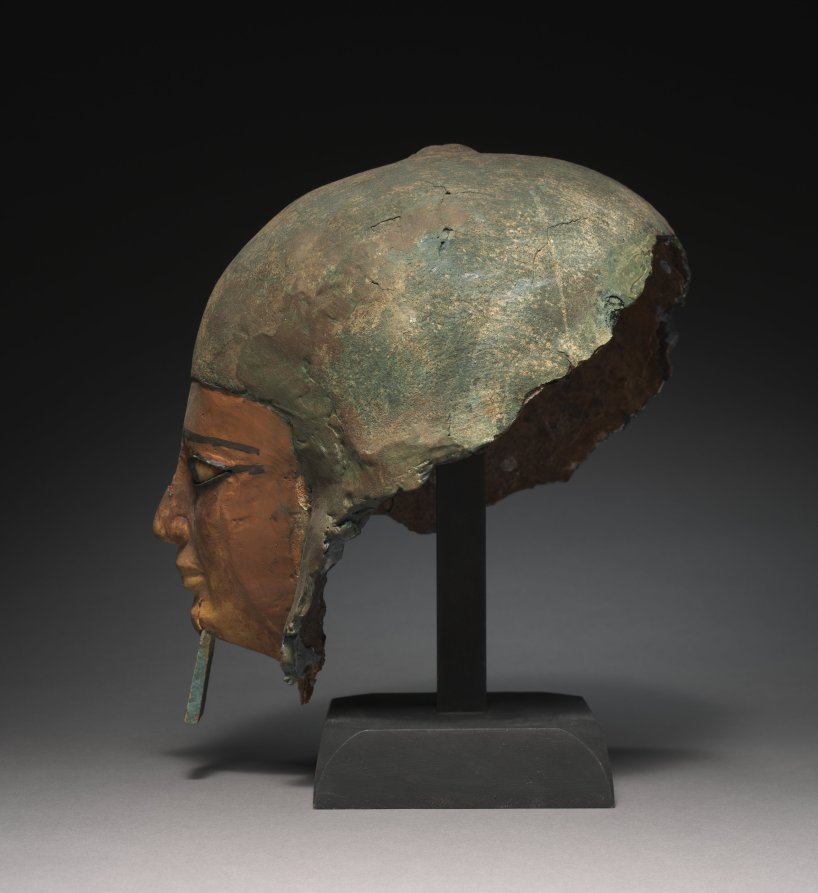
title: Mummy Mask of Senbi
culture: Egypt, Meir, Middle Kingdom (2040–1648 BCE), Dynasty 12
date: 1980–1801 BCE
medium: cartonage, wood, limestone, obsidian, paint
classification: Funerary Equipment